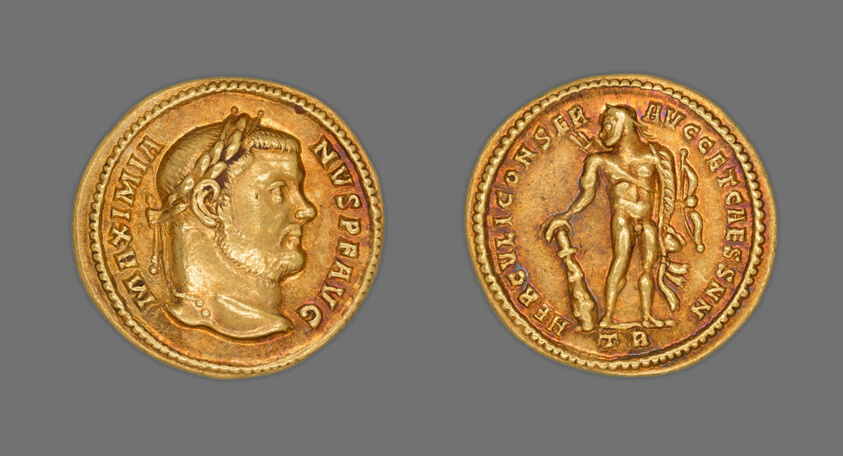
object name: Coin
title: Aureus (Coin) Portraying Emperor Maximianus Herculius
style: imperial (roman), ancient, roman (ancient, style or period)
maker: Roman; minted in Trier, Germany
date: 303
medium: Gold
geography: Roman Empire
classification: coin; ancient art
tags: portraits, lions, club, rulers (people), Heracles